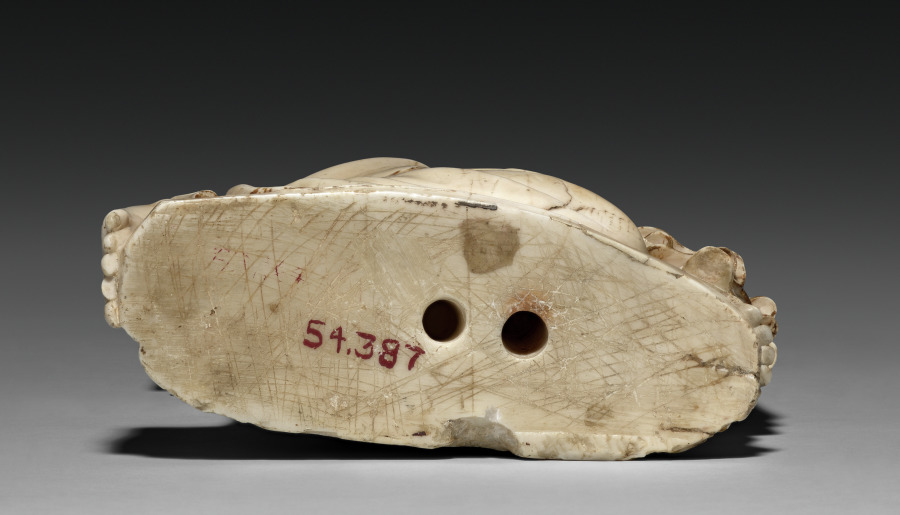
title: The Archangel Gabriel from an Annunciation Group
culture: France, Champagne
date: c. 1350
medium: alabaster with traces of paint and gilding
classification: Sculpture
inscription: Ave Maria, Gratia Plena.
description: In France, the use of alabaster began in the late 1200s for funerary monuments. The Archangel Gabriel, together with its counterpart, the Virgin Mary (now in the Louvre Museum, Paris) is part of an Annunciation. This is a rare example of alabaster sculpture from the 1300s. The alabaster comes from a quarry near Malaucène in Provence (France), making it an instance of long-distance trade of the rare material. Although the figure is very flat, it was likely made to also be viewed from the back, where there are remnants of gilding and the peacock feathers of the angel’s wing.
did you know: The surface of alabaster works can vary. By differentiating the intensity of polishing, it is possible for sculptures to create a surface with varying degrees of luster, or shine.